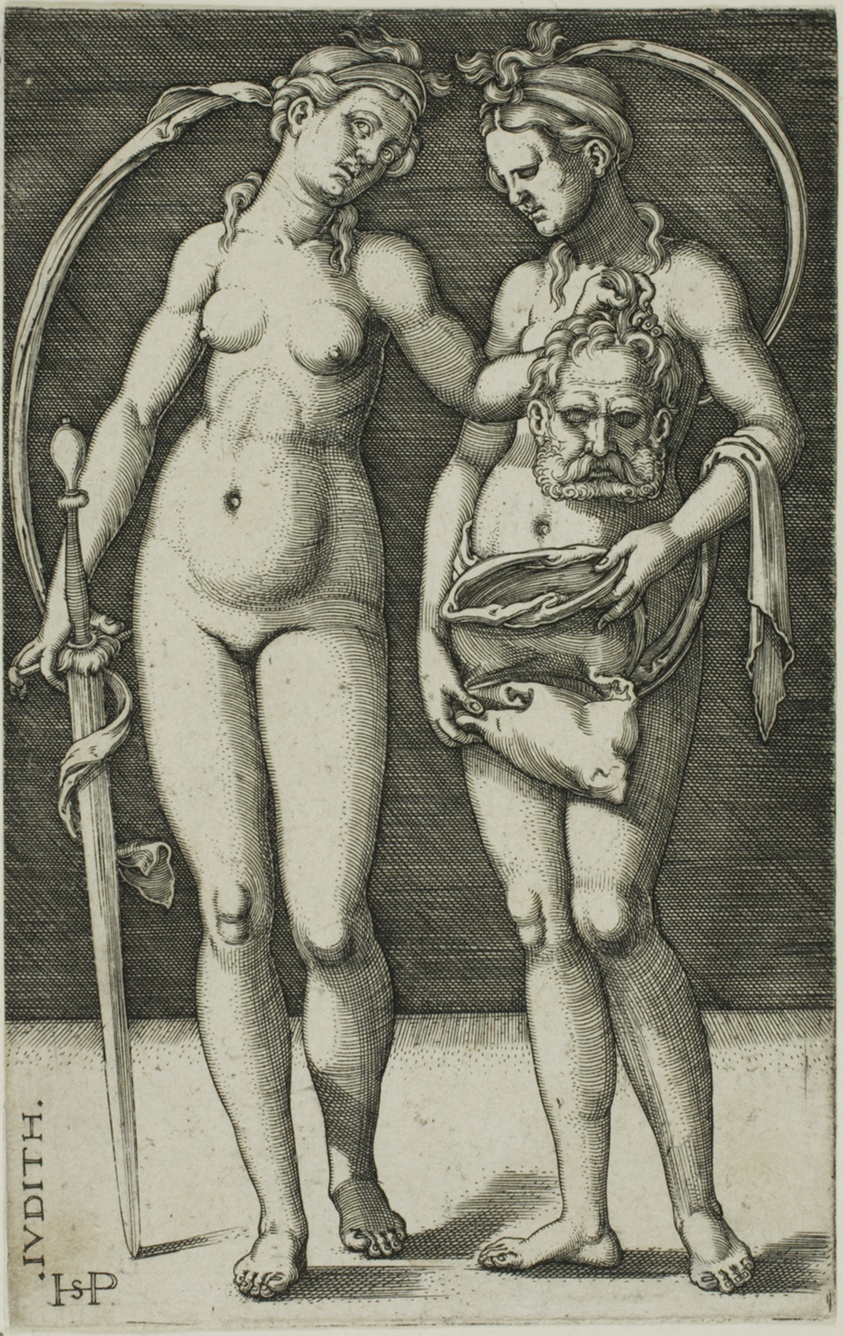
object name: Print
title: Judith and Her Servant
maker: Sebald Beham; German, 1500-1550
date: 1520–30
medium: Engraving in black on ivory laid paper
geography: Germany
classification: engraving; print; prints and drawing